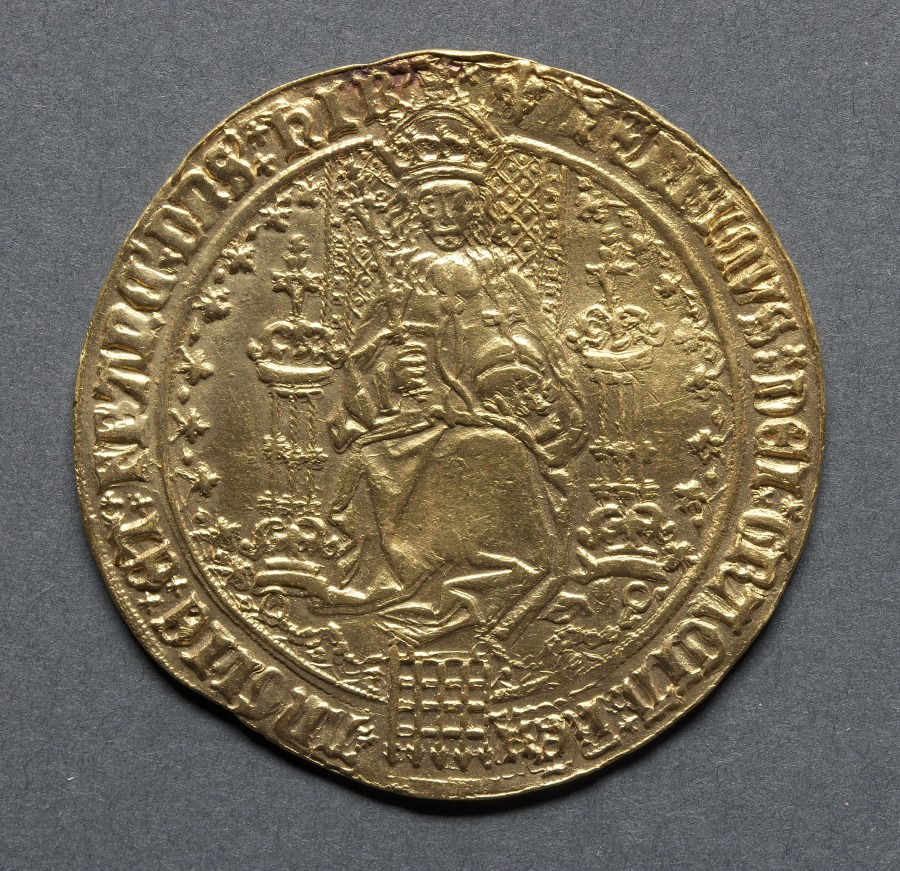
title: Sovereign: Henry VIII Enthroned (obverse); Royal Arms on Tudor Rose (reverse)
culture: England, Henry VIII, 1509-1547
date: 1526–44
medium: gold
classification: Coins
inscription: henricvs dei gracia rex anglie et franc dns hib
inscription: ihesvs avtem transiens per medivm illorvm ibat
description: During his life Henry VII had accumulated enormous wealth, and it took his son, Henry VIII, until 1542 to squander it. Henry knew how the English coinage had been debased in the past and did not see why it should not be debased again, this time for his personal benefit. Regardless of the inevitable financial catastrophe, he grasped at this easy revenue and in his last years not only debased the gold coinage to 20 ct., but the silver also, to one part silver and two parts alloy.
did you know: The Sovereign was first produced by Henry VII in 1489; he wanted a new gold coin to represent the power of his reign.